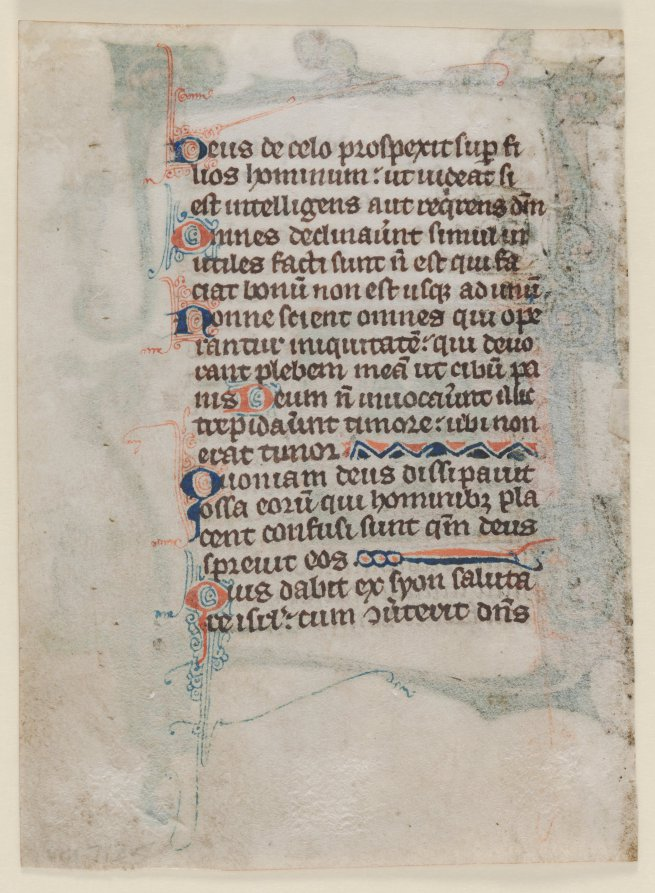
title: Leaf from a Psalter: Initial D: A Fool Rebuked by God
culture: Northern France or Flanders, St. Omer or Thèrouanne, 14th century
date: c. 1300–1320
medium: ink, tempera and gold on vellum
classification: Manuscript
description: The decorative marginal outgrowths, or extenders, of this initial include an assortment of drolleries—grotesque, often hybridized little figures that typically engage in amusing and diversionary activities. Drolleries are often shown playing musical instruments. Here one may be seen playing a vielle, an early stringed instrument played with a bow. The profusion of drolleries and whimsical marginalia in illuminated manuscripts, especially psalters, became increasingly popular around 1300, a phenomenon that has been much analyzed by scholars. Probably produced for a pious lay clientele, the margins of these tiny psalters are filled with endlessly varied and often highly animated animals, persons of every occupation (including clerics), hybrids, and monsters. Their function was often satirical and was clearly meant to amuse and give enjoyment. They may have also functioned as a kind of visual cue, enabling a book's user to locate specific pages and texts.